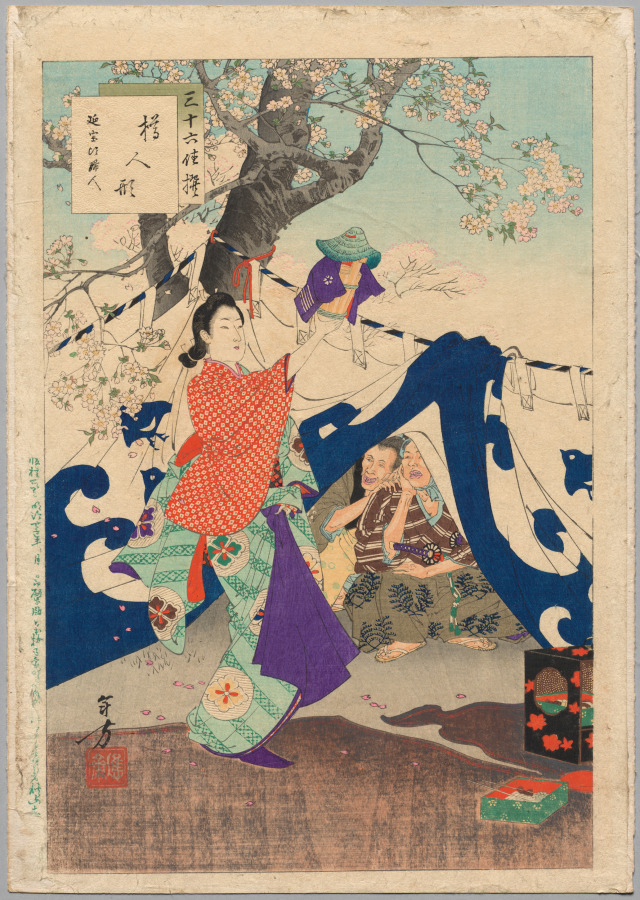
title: A Puppet Made from a Bucket, A Lady of the Enpō Era (1673–1681), from the series Thirty-six Elegant Selections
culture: Japan, Meiji period (1868–1912)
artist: Mizuno Toshikata (Japanese, 1866–1908)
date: 1894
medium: Woodblock print, ink and color on paper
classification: Print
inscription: Inscription Type: series title Inscription Transliteration: 三十六佳撰 Inscription Romanization: Sanjūrokkasen Inscription translation: The Thirty-six Elegant Selections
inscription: Inscription Type: artist’s signature Inscription Transliteration: 年方 Inscription Romanization: Toshikata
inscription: Inscription Type: artist’s seal Inscription Transliteration: 應斎年方 Inscription Romanization: Ōsai Toshikata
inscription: Inscription Type: engraver’s seal Inscription Transliteration: えん活刀 Inscription Romanization: En-Katsu to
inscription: Inscription type: date and publisher’s information Inscription Translation: Meiji 27 (1894) Akiyama Buemon (summary)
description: Each of the prints in the series Thirty-six Elegant Selections features a woman from a different time period, as befits an artist who was interested in history painting. Most of the prints are set in the Edo period (1615–1868). Mizuno Toshikata was a favored student of Tsukioka Yoshitoshi (1839–1892), and took over his post as a newspaper illustrator.